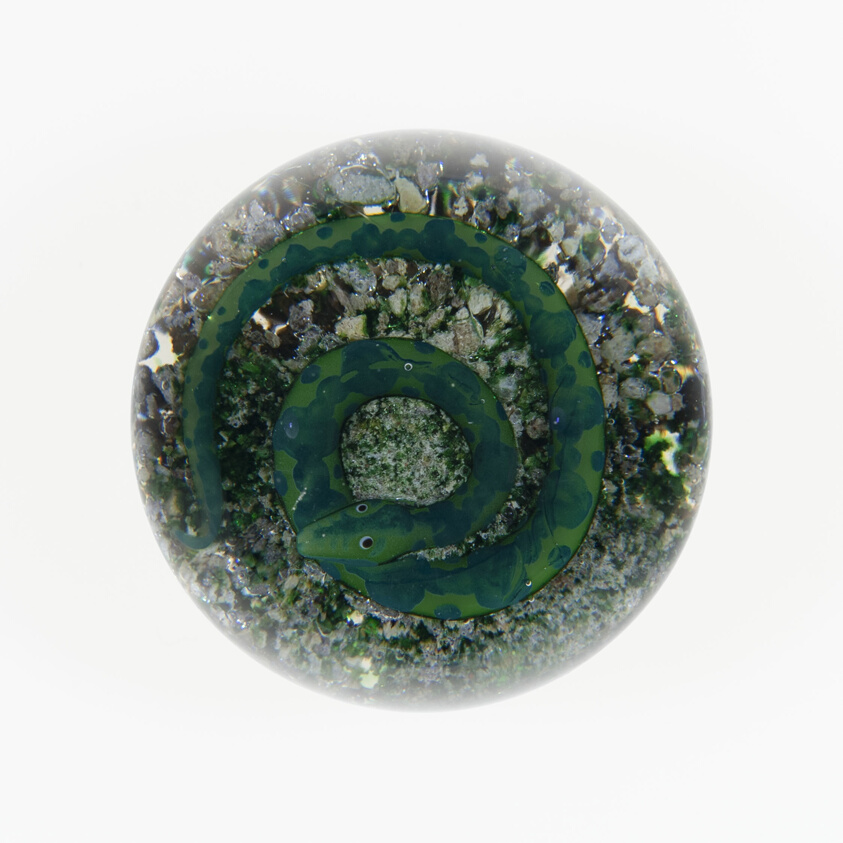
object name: Glass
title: Paperweight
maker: Baccarat Glassworks (Cristalleries de Baccarat); Lorraine, France, founded 1764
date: c. 1848–55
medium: Glass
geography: Lunéville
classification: paperweight; glass; european decorative arts